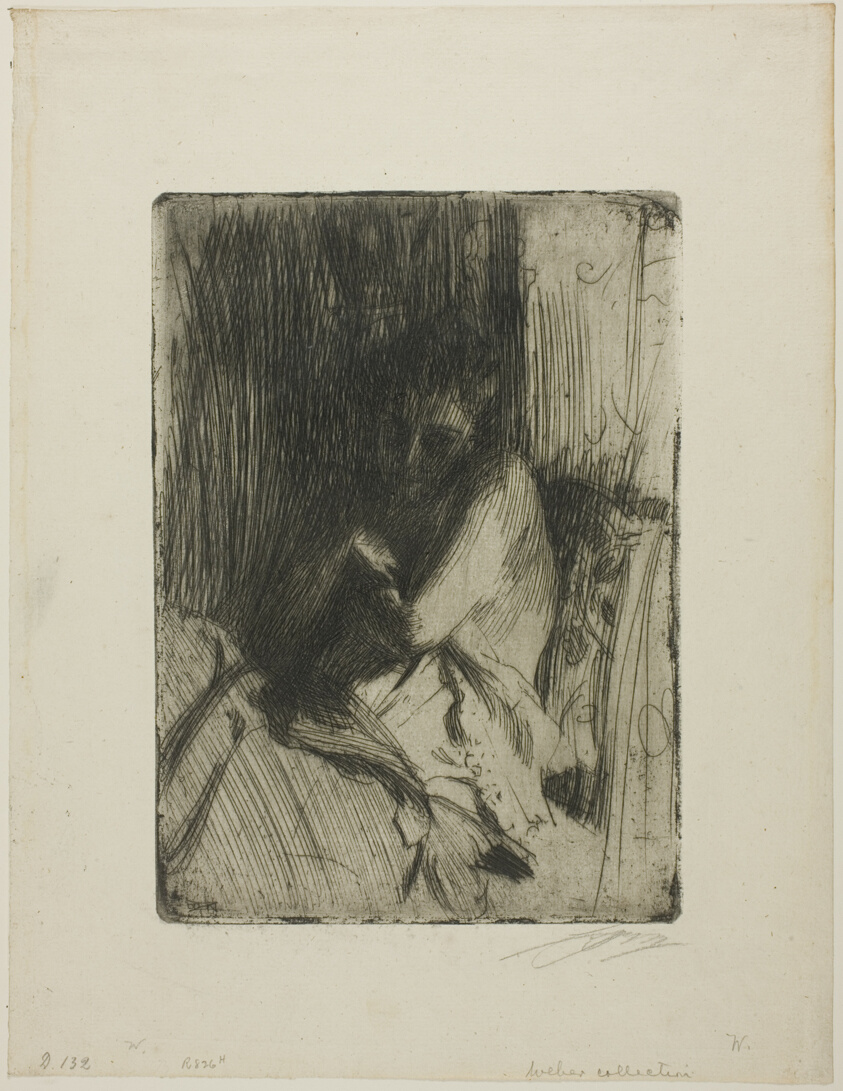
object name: Print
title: Surprised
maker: Anders Zorn (Swedish, 1860-1920)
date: 1898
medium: Etching on ivory laid paper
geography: Sweden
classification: etching; print; prints and drawing